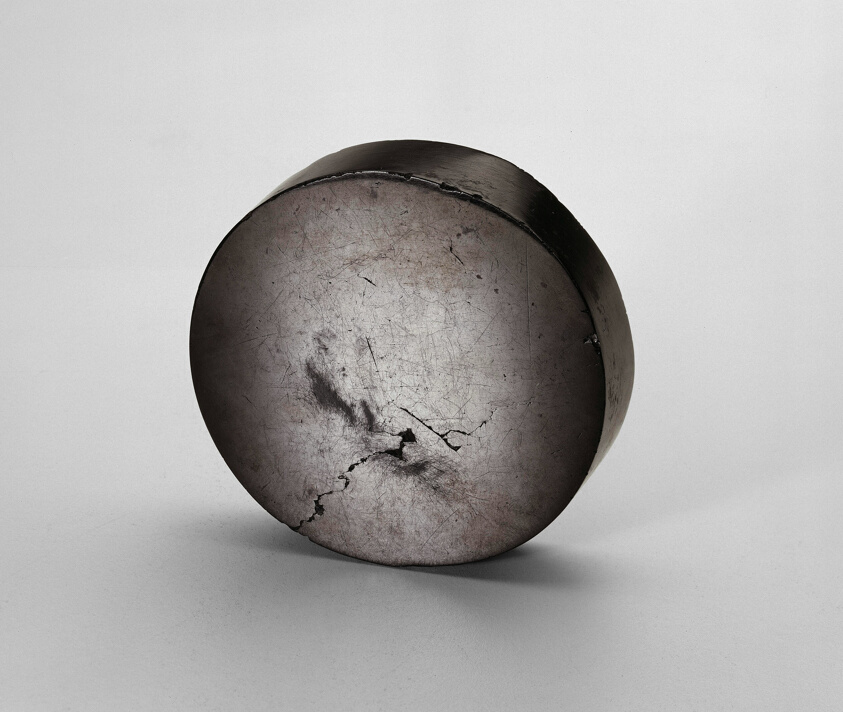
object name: Religious/Ritual Object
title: Divination Mirror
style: chavín horizon, cupisnique, early horizon, Pre-Columbian, americas, andes, Arts of the Americas, andean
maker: Chavín-Cupisnique; North coast, Peru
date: 900–600 BCE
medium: Anthracite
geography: Peruvian North Coast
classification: ritual objects; ceremonial object; art of the americas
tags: mirrors, ritual objects